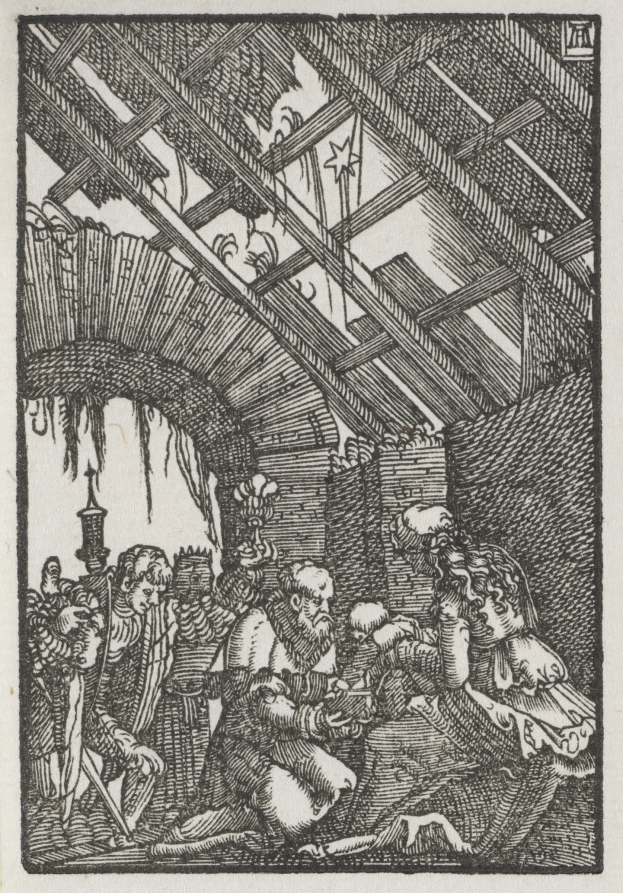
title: The Fall and Redemption of Man: The Adoration of the Magi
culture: Germany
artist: Albrecht Altdorfer (German, c. 1480–1538)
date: c. 1515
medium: woodcut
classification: Print